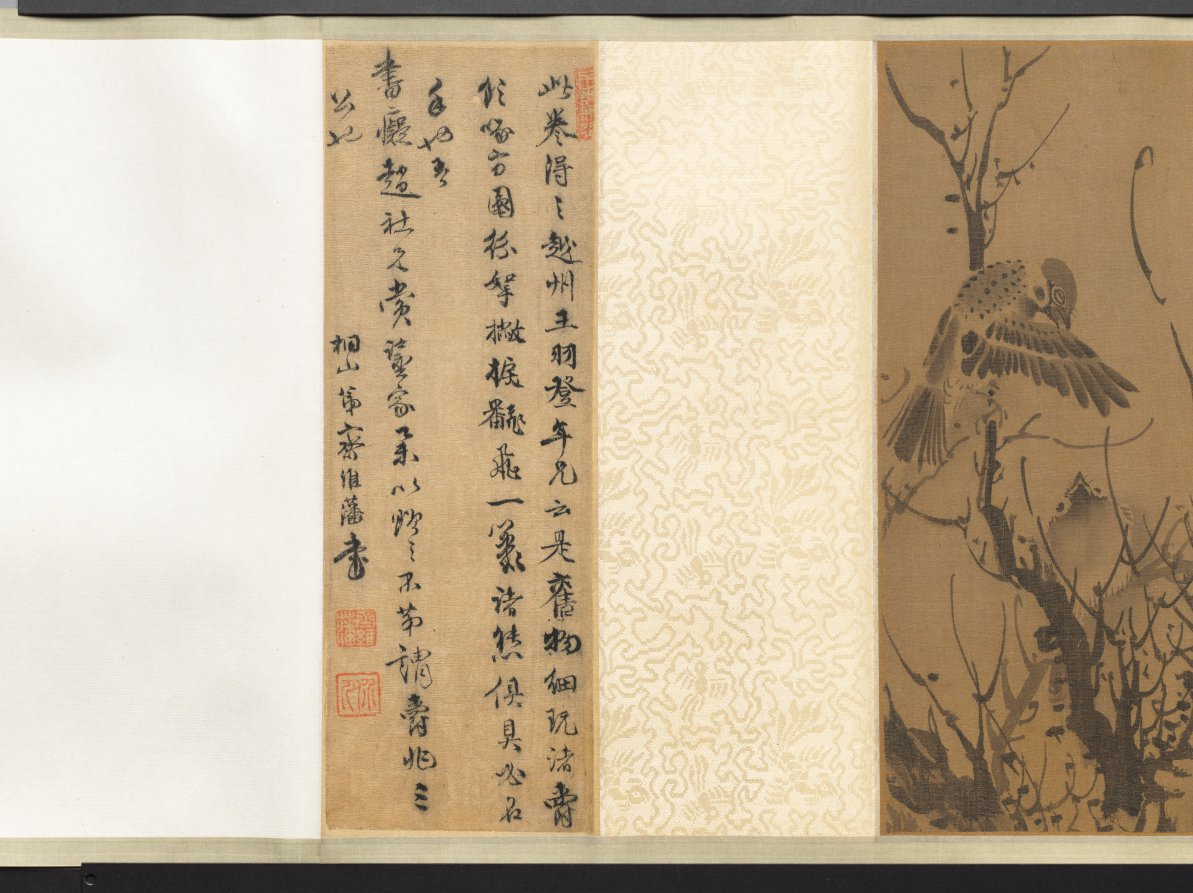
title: A Hundred Sparrows in a Lofty Grove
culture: China, Ming dynasty (1368–1644)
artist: attributed to Lin Liang (Chinese, 1416–1480)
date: 1368–1644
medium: handscroll; ink on silk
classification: Painting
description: Sparrows engaged in all kinds of activities frolic amid leafy branches, blades of grass, rocks, and a waterfall. As our eyes move over the scroll, the artist engages us in enjoying the sparrows’ carefree movements in a natural setting. The charming birds were painted from close observation in swift and fluent brushstrokes. Sparrows are a common bird and in Chinese painting they often represent the commoner in human society as opposed to the noble pheasant or peacock representative of the ruling class.